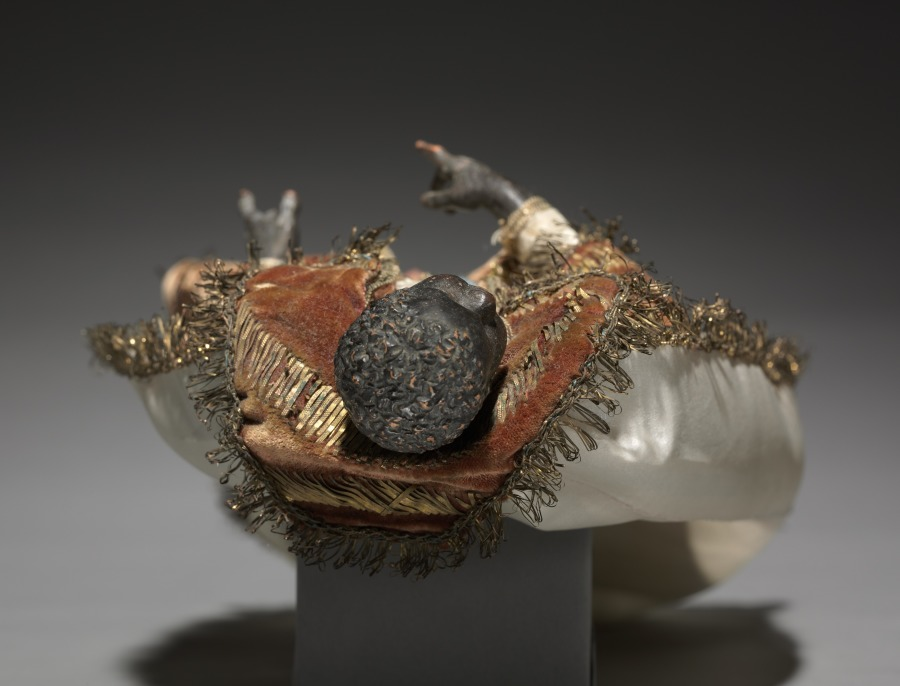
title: Figure from a Crèche: Negro Magus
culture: Italy, Naples, late 18th-early 19th century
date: 1780–1830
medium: painted wood and terracotta with various textiles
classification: Sculpture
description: The practice of creating scenes of the Nativity for the home dates from the early 1700s in Italy, where people began to set up doll-like figures of about a foot or less in height. The custom was particularly popular in Naples around 1800, where crèche scenes (crèche means cradle, or crib) included many figures, whose heads and hands of painted terracotta, stuffed cloth bodies, and clothing adapted from contemporary local costumes gave them an amazingly realistic character. Representations of the birth of Jesus can be traced to the first few centuries of Christianity. Both living creatures and sculptural depictions of them were used from early times. By the late middle ages it was customary to create life-size figures of wood or stone, naturalistically painted, to represent the characters who participated in the events of Jesus's early life. These sculptures were then arranged in scenes illustrating one or both of the most important of these events, the Adoration of the Shepherds and the Adoration of the Magi-the three kings from the East who came to pay homage to the Christ child. Used in churches, these large figures were especially popular in Italy, Central Europe, Spain, and Portugal.